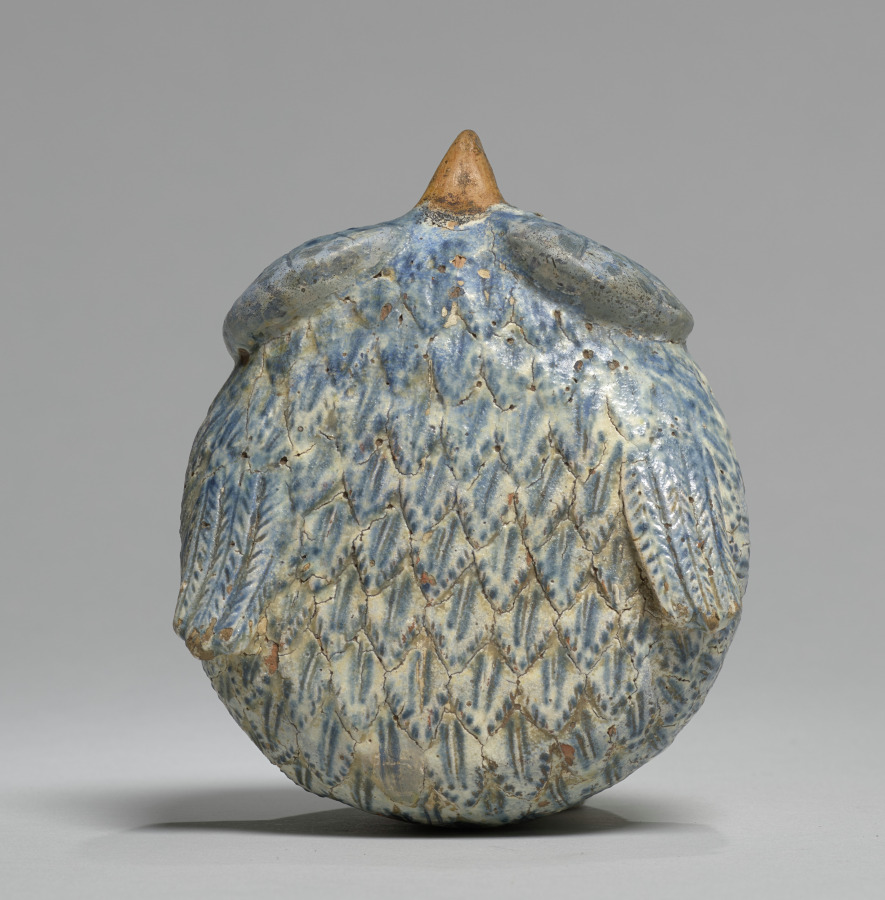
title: Owl (head)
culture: Southern Germany, 16th century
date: 1540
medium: faience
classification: Ceramic